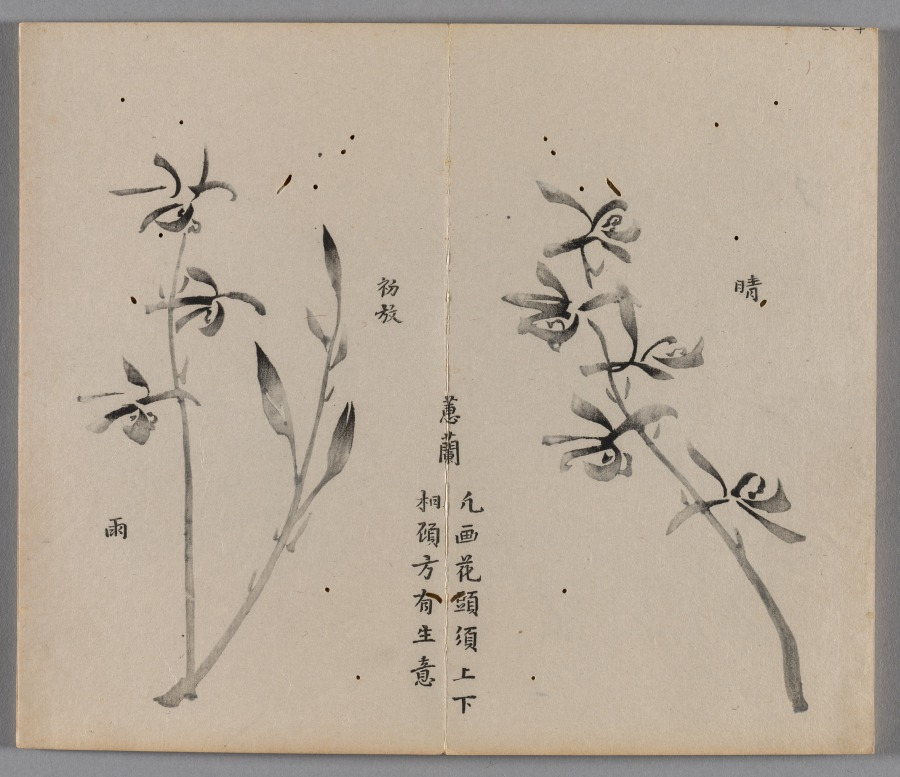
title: Ten Bamboo Studio Painting and Calligraphy Handbook (Shizhuzhai shuhua pu): Orchids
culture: China, Qing dynasty (1644-1911)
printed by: Hu Zhengyan (Chinese, c. 1584–1674)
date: 1633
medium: Woodblock-printed book; ink and colors on paper; first edition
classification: Print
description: Color printing reached a level of perfection in the early 1600s, as seen in this Ten Bamboo Studio Collection of Calligraphy and Painting and the Mustard Seed Garden Manual of Painting (printed 1679 and 1701). The painterly quality, precision in registering (aligning) the woodblocks, and harmonious colors made them the most successful color print editions in Chinese history. Both editions were printed and compiled in Nanjing, spread nationwide, and had a great impact on the arts in Japan and Korea.